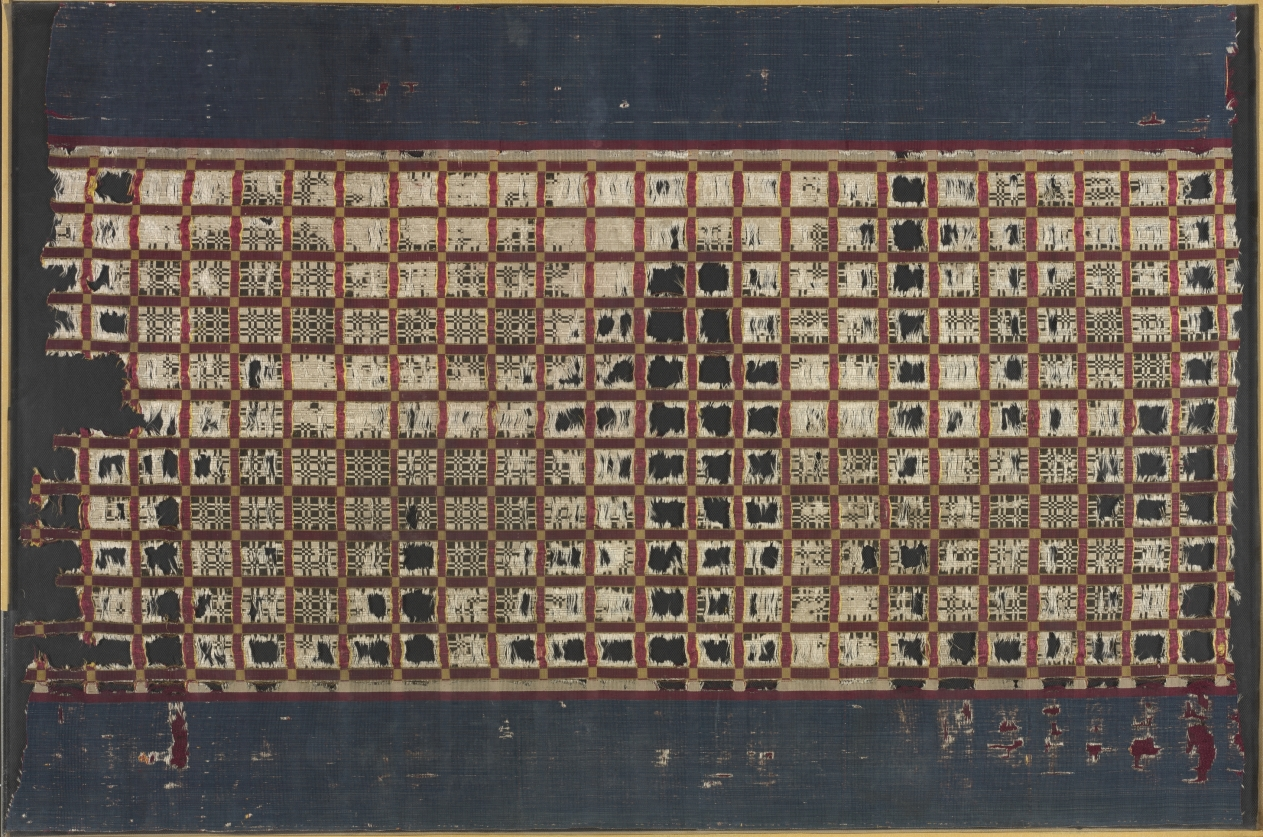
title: Wall Hanging (msimsim)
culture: Africa, North Africa, Morocco, Moroccan weaver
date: 1600s–1800s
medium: silk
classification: Textile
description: Woven silk msimsim wall hangings are made in the Moroccan city of Tétouan, and gifted by a groom to his bride. It is composed of both compound tabby and double tabby weave. Now highly damaged and missing much of its threads, this textile would be placed over a doorway within the new home. Its traditional design is a double-sided gridded brocade (raised woven pattern), navy on one side, crimson on the other.